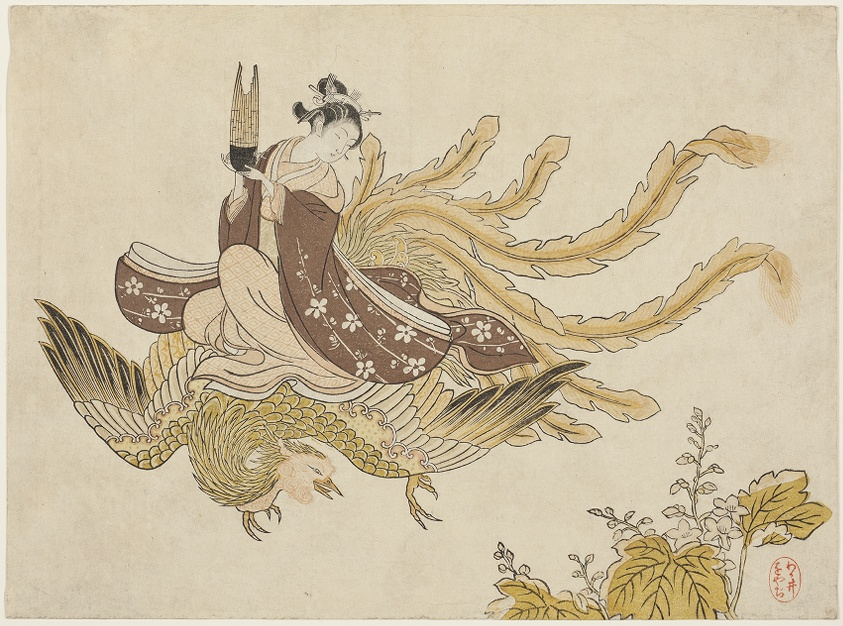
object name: Print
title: Young Woman Riding a Phoenix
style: Japanese (culture or style)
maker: Attributed to Suzuki Harunobu 鈴木 春信; Japanese, 1725 (?)–1770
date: 1765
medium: Color woodblock print; chuban yoko-e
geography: Japan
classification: woodblock print; print; asian art